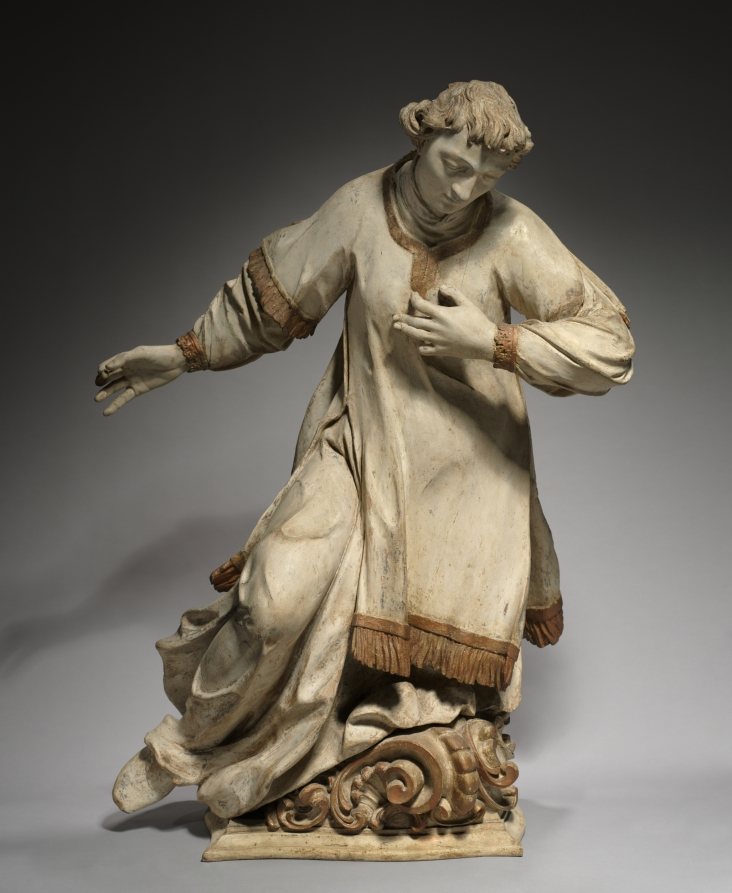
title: Kneeling Saint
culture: Germany, Munich, second half 18th century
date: 1750–1800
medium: painted and gilded wood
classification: Sculpture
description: This serene figure would originally have been part of a larger group, perhaps shown kneeling in adoration of Christ or the Virgin. He wears a knee-length dalmatic, the ecclesiastical dress of deacons (ordained ministers in the Catholic Church). Saints Lawrence and Stephen were among the most popular deacon saints, but lacking an identifying attribute—probably once attached to the saint’s outstretched hand—it is not possible to associate this figure with a specific saint.